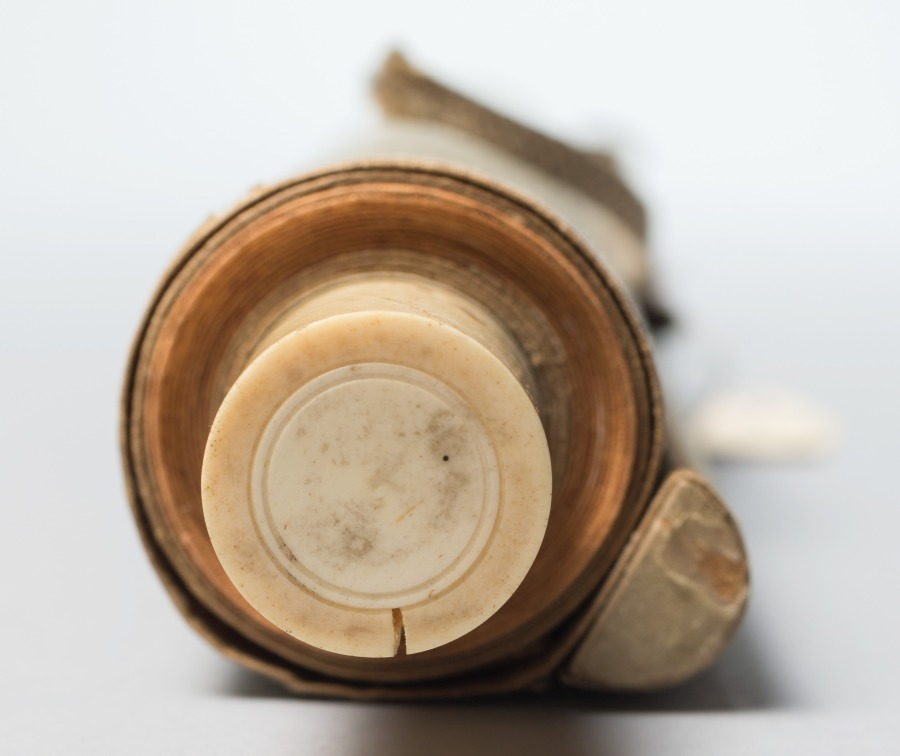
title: White-Robed Guanyin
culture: China, Yuan dynasty (1271-1368)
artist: copy after Jueji Yongzhong (Chinese, active around 1300)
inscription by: Zhongfeng Mingben (Chinese, 1263–1323)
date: late 1200s–early 1300s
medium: hanging scroll; ink and gold on silk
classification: Painting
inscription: Inscription: one of the 84,000 painted by the priest Insei.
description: The original model for this ink drawing of Guanyin, the bodhisattva of infinite compassion (Avalokiteshvara in Sanskrit), is CMA 1978.47.1. This drawing is a later copy with the same image of the White-Robed Guanyin, but in reverse. The inscription above reads: one of the 84,000 painted by the priest Insei. The inscription seems to indicate that the Japanese priest Insei repeatedly copied the image of the bodhisattva in an act of piety and to accumulate merit, as is promised in the Lotus Sutra for anyone who paints images of the Buddha, they “will achieve the Buddha path.” The priest’s name and seal need further study and identification.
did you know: The bodhisattva's face and halo were delicately painted in gold.